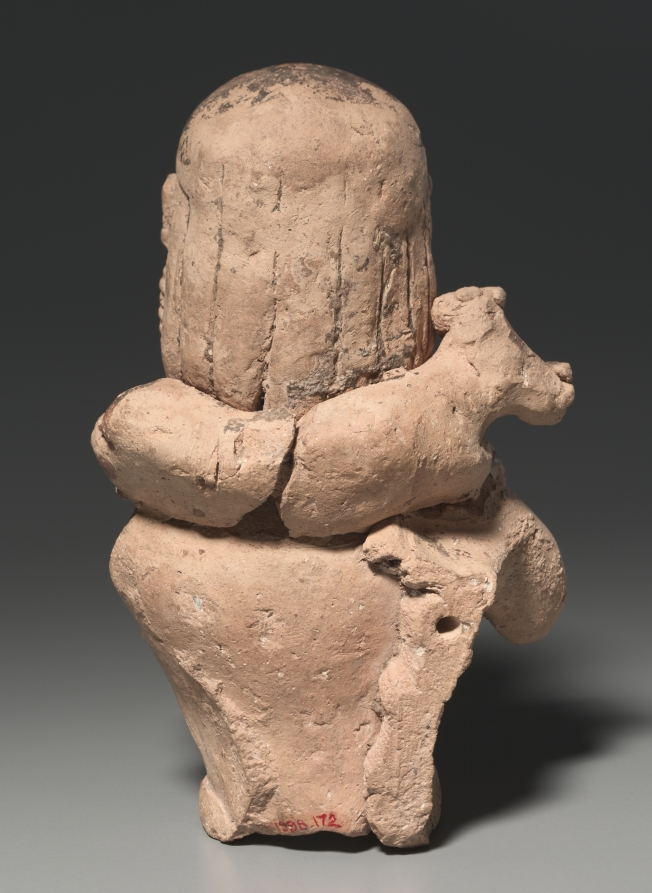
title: Kriophoros (Ram-Bearer), Statuette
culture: Greece, Crete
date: 650–600 BCE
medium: terracotta and polychrome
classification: Sculpture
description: In Greek art, the kriophoros is usually a shepherd or, later, Hermes. This statuette may be unique in presenting a warrior-hero as kriophoros. It is certainly one of the earliest sculptural representations of this type. The figure appears to be wearing a helmet, secured under the chin with a painted strap. Double outlines, reinforced at the bottom with incision and adorned with dotted circles in the area of the nipples, were used to suggest breastplates. A thick waist belt, decorated with painted crosshatched lines, is clearly the heroic zoster (warrior's belt). As described in ancient Homeric poetry, the zoster is the ultimate symbol of valor and prowess, worn by such heroes as the brothers Agamemnon and Menelaos and old King Nestor. This figure is shown in the solemn act of presenting a ram, most likely as a sacrificial offering, to a god or goddess.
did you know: This heroic figure is shown presenting a ram, most likely as a sacrificial offering to a god or goddess.